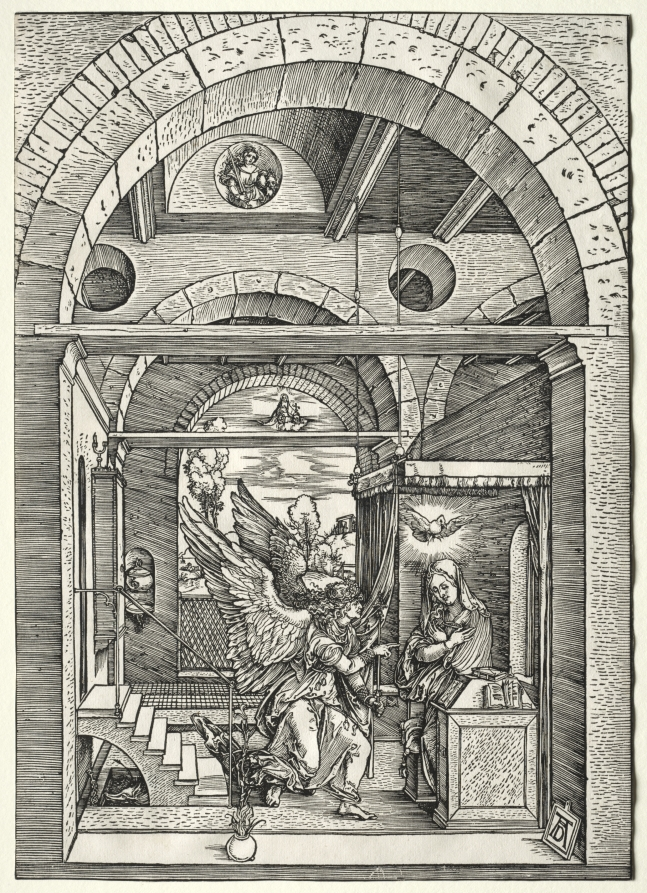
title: The Annunciation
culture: Germany, early 16th Century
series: The Life of the Virgin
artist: Albrecht Dürer (German, 1471–1528)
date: c. 1503–5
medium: woodcut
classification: Print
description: Dürer’s Gabriel is no humble messenger: he commands the space with rippling drapery and an expansive spread of wings. Indeed, it is Mary who seems submissive, dwarfed by the massive architecture and her new responsibility as the mother of God. The grand setting underscores the drama of the moment and displays Dürer’s command of mathematical perspective. Details in Dürer’s Annunciation held significance for European Christians. For example, the dove hovering above Mary’s head in a blaze of light indicates the moment the Holy Spirit impregnates her; the Old Testament heroine Judith, depicted in a roundel just below the ceiling, symbolizes Mary’s victory over the devil.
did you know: Dürer's cycle depicting Mary's life, which gained instant acclaim, was remarkable not only for its theological accuracy but also for its unprecedented wealth of detail.